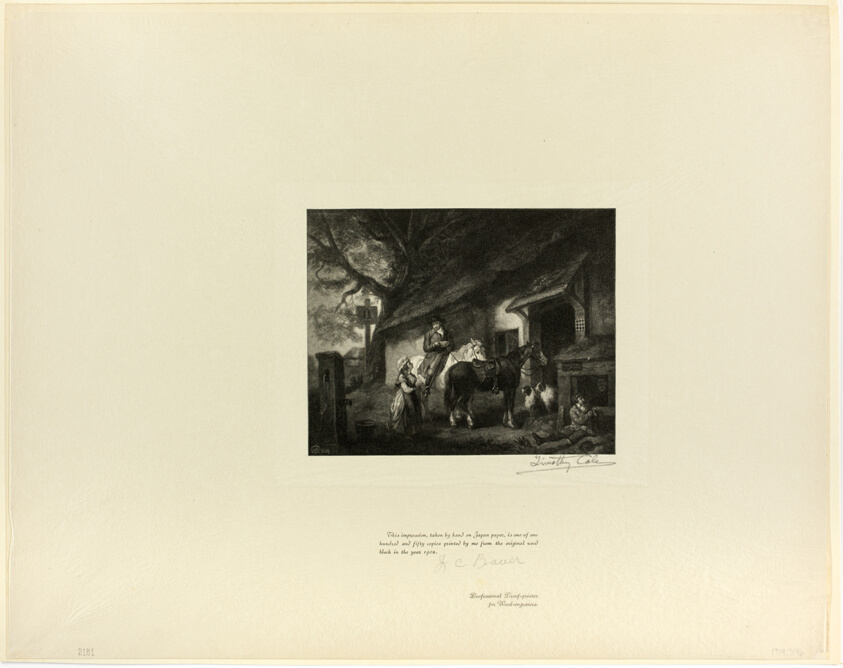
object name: Print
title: The Halt, from Old English Masters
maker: Timothy Cole (American, born England, 1852-1931); after George Morland (English, 1763-1804)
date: 1900, printed 1902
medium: Wood engraving on chine paper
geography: United States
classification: wood engraving; print; prints and drawing